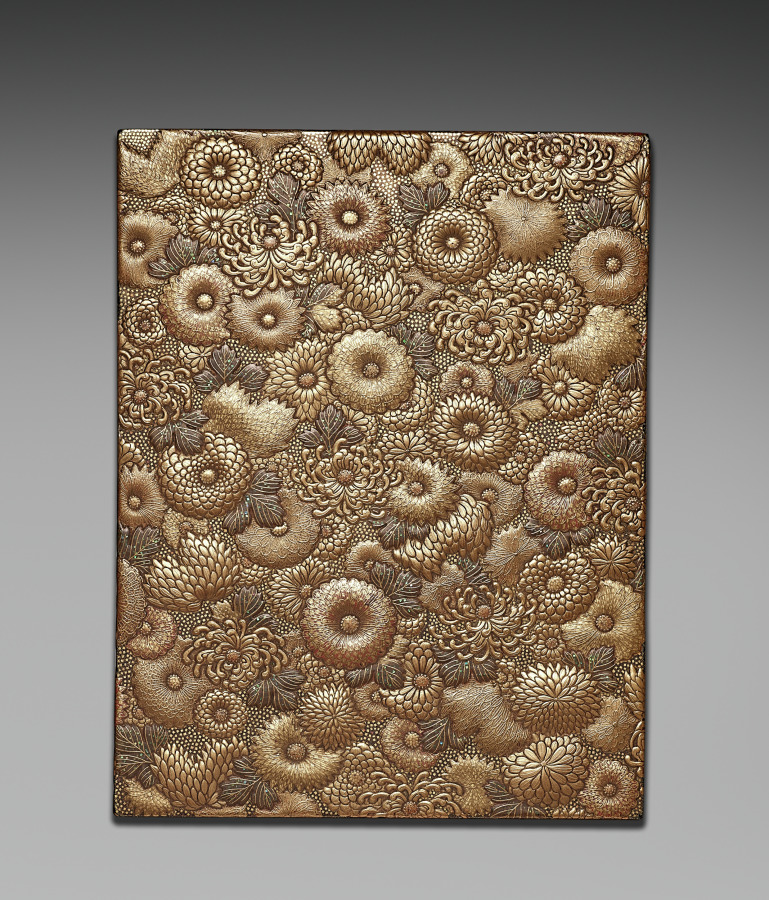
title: Nested Boxes with Chrysanthemums (outer box)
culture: Japan, Meiji period (1868–1912)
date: early 1900s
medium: lacquer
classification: Lacquer